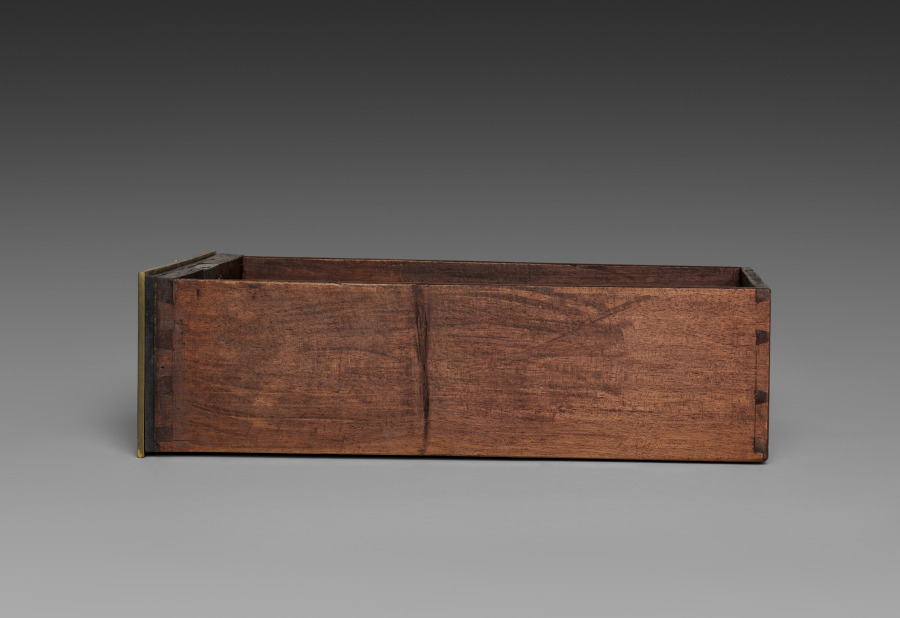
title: Side Drawer for Cabinet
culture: France, late 17th Century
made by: André-Charles Boulle (French, 1642–1732)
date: c. 1690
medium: ebony, marquetry in metal and tortoise shell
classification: Furniture and woodwork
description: Appointed cabinetmaker to King Louis XIV in 1672, André-Charles Boulle became a master of furniture making in France during the late 1600s until his death in 1732. Known primarily for his use of marquetry, in which metal patterns are inlaid into tortoiseshell then applied within the veneered surface of the furniture, Boulle established a level of quality and craftsmanship few others could achieve. As a result, his work found favor at the royal court and among other aristocrats and diplomats eager to impress the king. The inclusion of a medallion depicting Louis XIV within the bronze decoration of this chest would have identified the owner with the royal court. Often exhibiting stout architectural proportions with elegant groups of inlaid motifs such as the parrot on the central panel of this chest, Boulle’s designs are an example of the intellectual fashion for contrasting ideas, materials, and motifs.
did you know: Originally designed to sit atop an elaborate tall stand, this chest was likely altered in the late 1700s to reduce its scale and height.